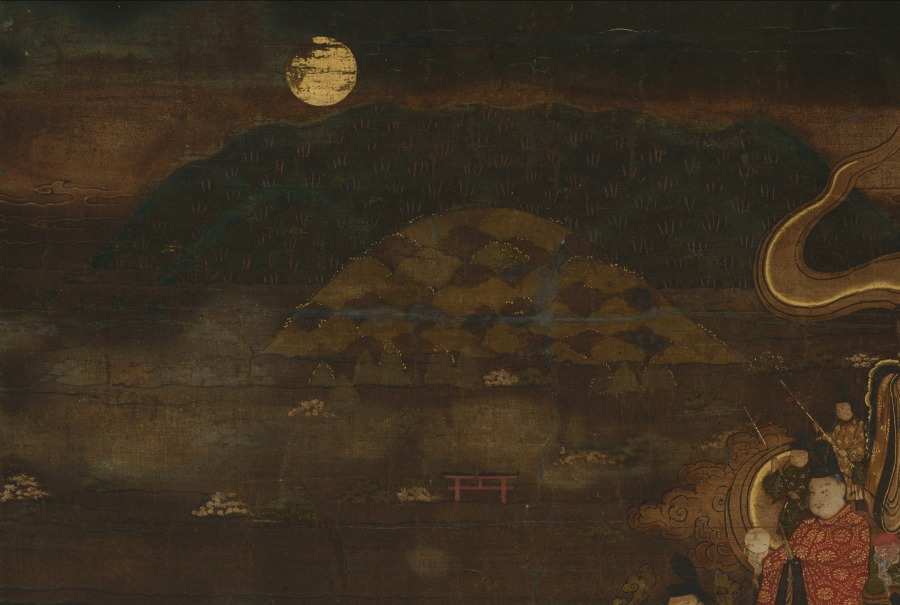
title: Descent of the Nine Luminaries and the Seven Stars at Kasuga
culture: Japan, Nanbokuchō period (1336–92)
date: mid- to late 1300s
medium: Hanging scroll; ink, color, gold and cut gold on silk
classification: Painting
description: This medieval religious painting shows celestial beings descending from the heavens into the Kasuga Shrine, a major religious site in Japan's ancient capital, Nara. The moon and the Kasuga mountain range appear in the uppermost portion of the painting, as does a red shrine entrance gate, or torii. In the upper part of the painting, figural representations of the stars in the constellation known as the Big Dipper in the West descend from right to left on cloud banks. In the lower part, the Nine Luminaries (Sanskrit: Navagraha) that emerged from the Vedic tradition—the sun and moon; the planets Jupiter, Mars, Saturn, Venus, and Mercury; and personifications of the fluctuating lunar nodes—descend in similar fashion. The painting uses the "deities in descent" scheme originating in China, as well as the original Buddhist form mandala (Japanese: honjibutsu mandarazu) format prevalent in medieval Japanese Shinto-Buddhist painting, to generate an image connected to the worship of celestial bodies in Esoteric Buddhism.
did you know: A 19th-century copy of this painting in ink and light color exists at the Kyoto City University of Arts.